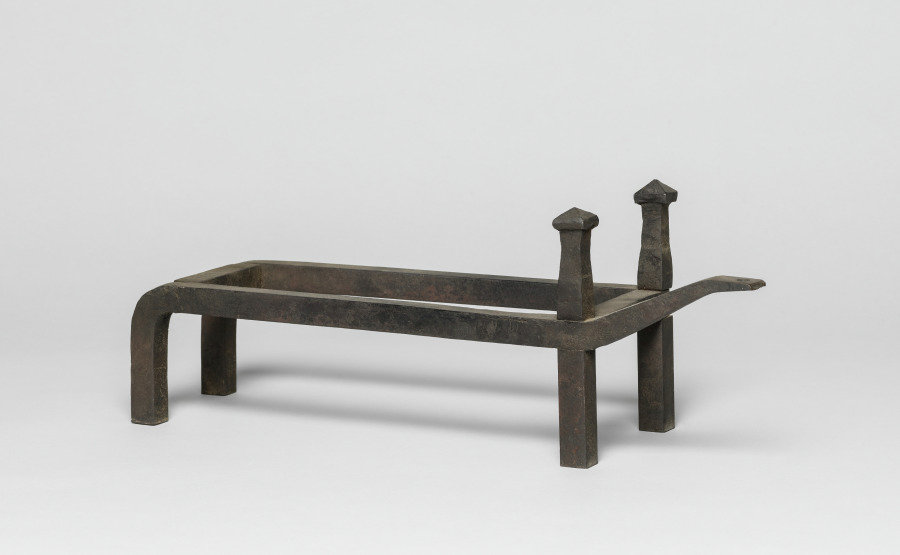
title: Andiron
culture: France, style of Louis XVI, 18th Century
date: c. 1770–1790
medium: marble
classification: Furniture and woodwork